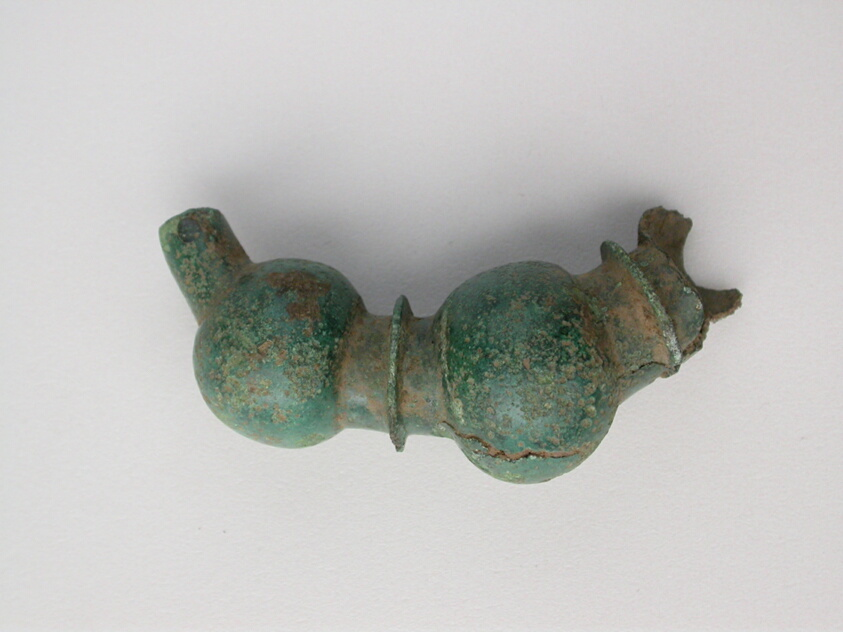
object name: Costume and Accessories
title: Bow Fibula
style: geometric, ancient, greek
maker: Greek; Thessaly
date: Geometric Period (800–700 BCE)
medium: Bronze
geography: Greece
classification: votive offering; jewelry; ex-voto; fibula; costume